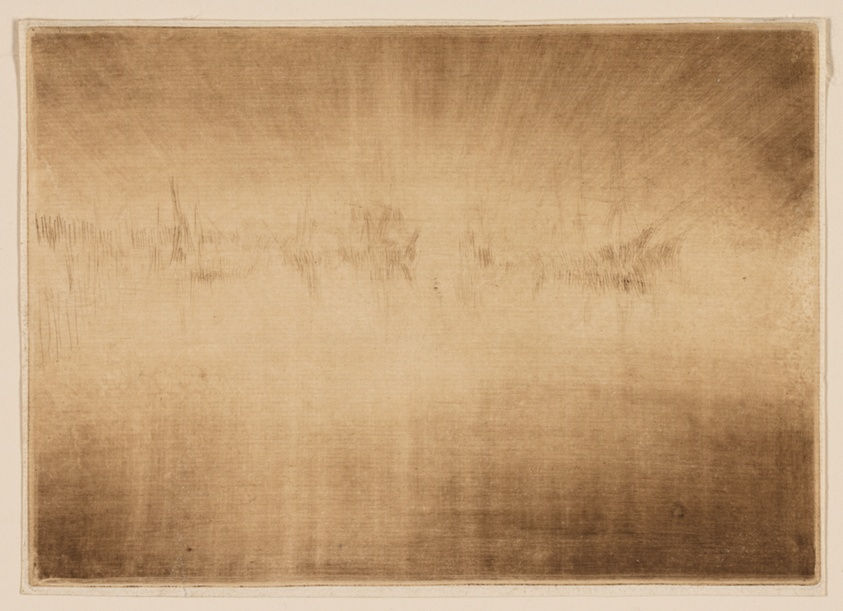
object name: Print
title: Nocturne: Shipping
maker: James McNeill Whistler (American, 1834-1903)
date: 1879/80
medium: Drypoint in dark brown ink on ivory laid paper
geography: United States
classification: drypoint; print; prints and drawing; paper